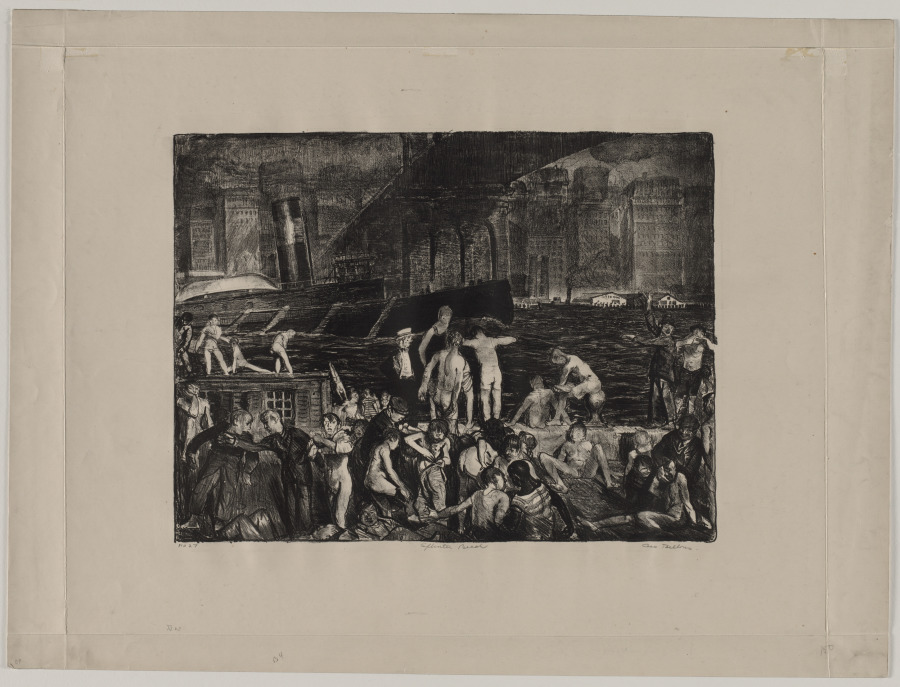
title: Splinter Beach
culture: America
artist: George Bellows (American, 1882–1925)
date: 1916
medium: lithograph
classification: Print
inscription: In graphite, lower left, recto: "No 27"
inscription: In graphite, center, recto: "Splinter Beach"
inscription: In graphite, lower right, recto: "Geo. Bellows"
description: During George Bellows’s first decade in New York City, starting in 1904, newspapers ran many stories about the “social problem” of the urban poor, reporting that the city’s tenement district lacked cleanliness and order. Drawn to this unvarnished side of city life, Bellows made several images of the public docks along the East River that were unofficial places of recreation for the city’s tenement children. Both Splinter Beach and River-Front feature, without sentimentality, children that display their nakedness unabashedly. Disturbingly, both images feature fully clothed adults observing or even touching children, as well as other sexual touching. Portrayals of sexual indecency in Bellows’s work aligned with the off-color humor often found in fictional representations of the urban poor of the time.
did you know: Splinter Beach was located under the Brooklyn Bridge, the underside of which can be seen in this image.